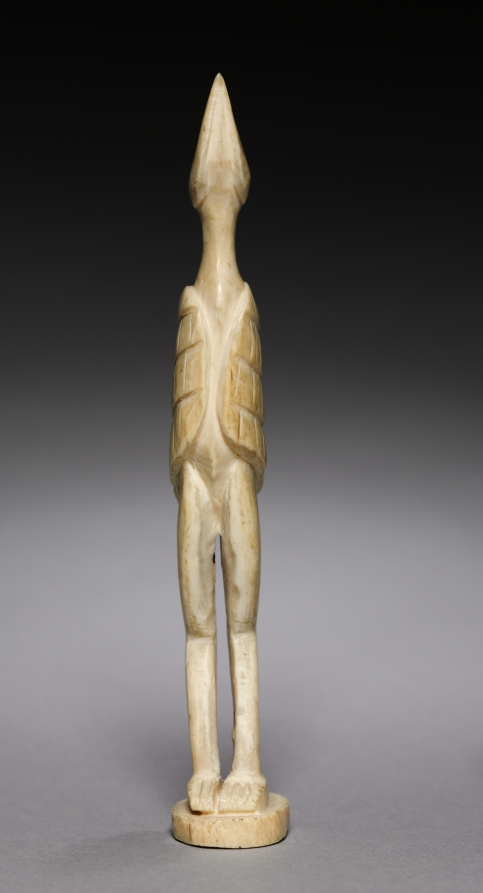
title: Bird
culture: Africa, Central Africa, Democratic Republic of Congo, unknown maker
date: 1900s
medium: Elephant ivory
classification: Sculpture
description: This long-legged bird of an unidentified species was most likely carved as a souvenir.